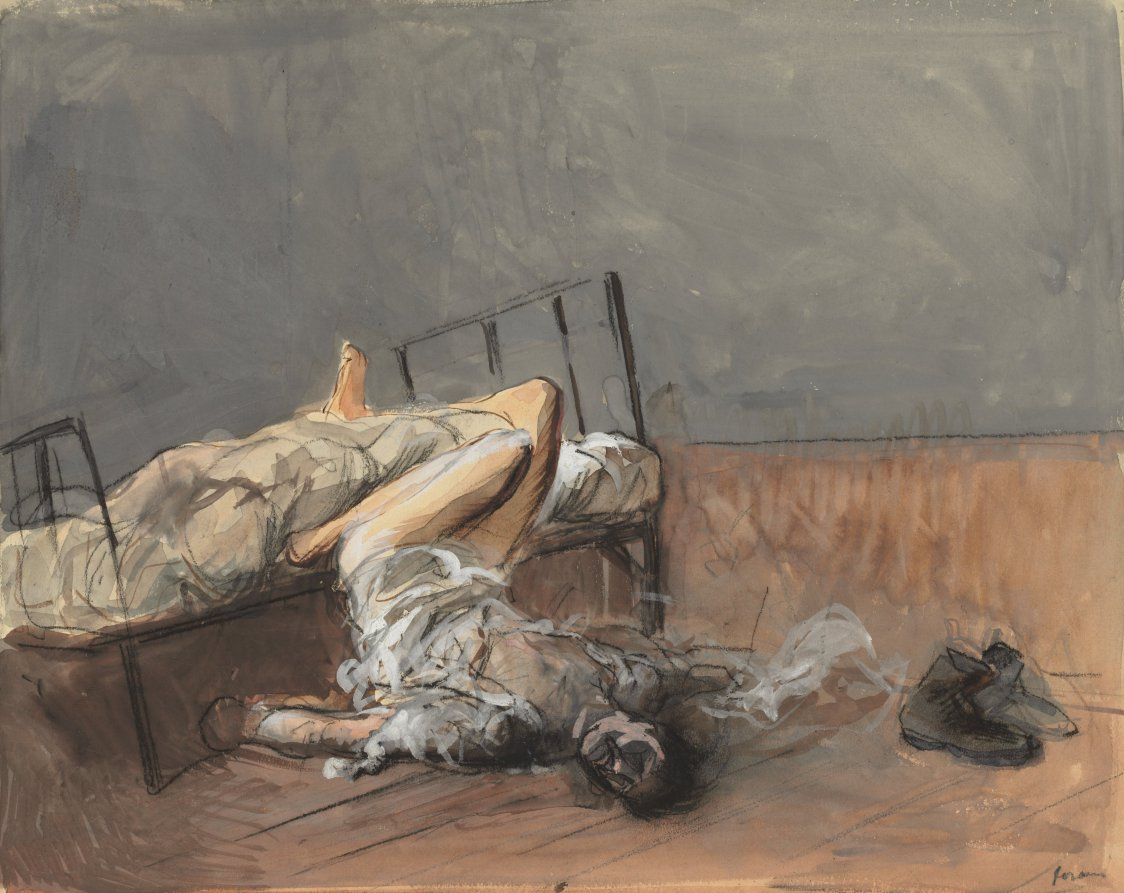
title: The Suicide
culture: France, late 19th-early 20th Century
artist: Jean Louis Forain (French, 1852–1931)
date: fourth quarter 1800s or first third 1900s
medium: watercolor and gouache over black crayon; framing lines in black crayon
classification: Drawing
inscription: signed, lower right, in graphite: forain ; across bottom, in graphite: Les deux Ecoles: A Fresnes-les-Rungis. "Elles étaient à lacets.". ; lower right, in graphite: A2169